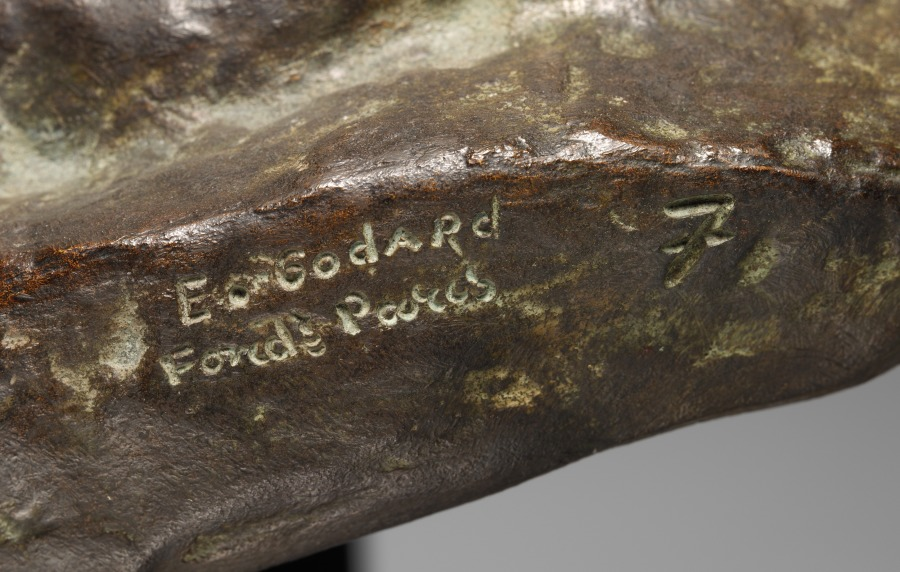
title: Mask of Hercules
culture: France, 20th century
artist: Emile Antoine Bourdelle (French, 1861–1929)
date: 1909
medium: bronze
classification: Sculpture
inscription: Inscribed at neck, lower left: "© Bourdelle"; beneath right ear: "E. Godard/Fondr Paris / 7"